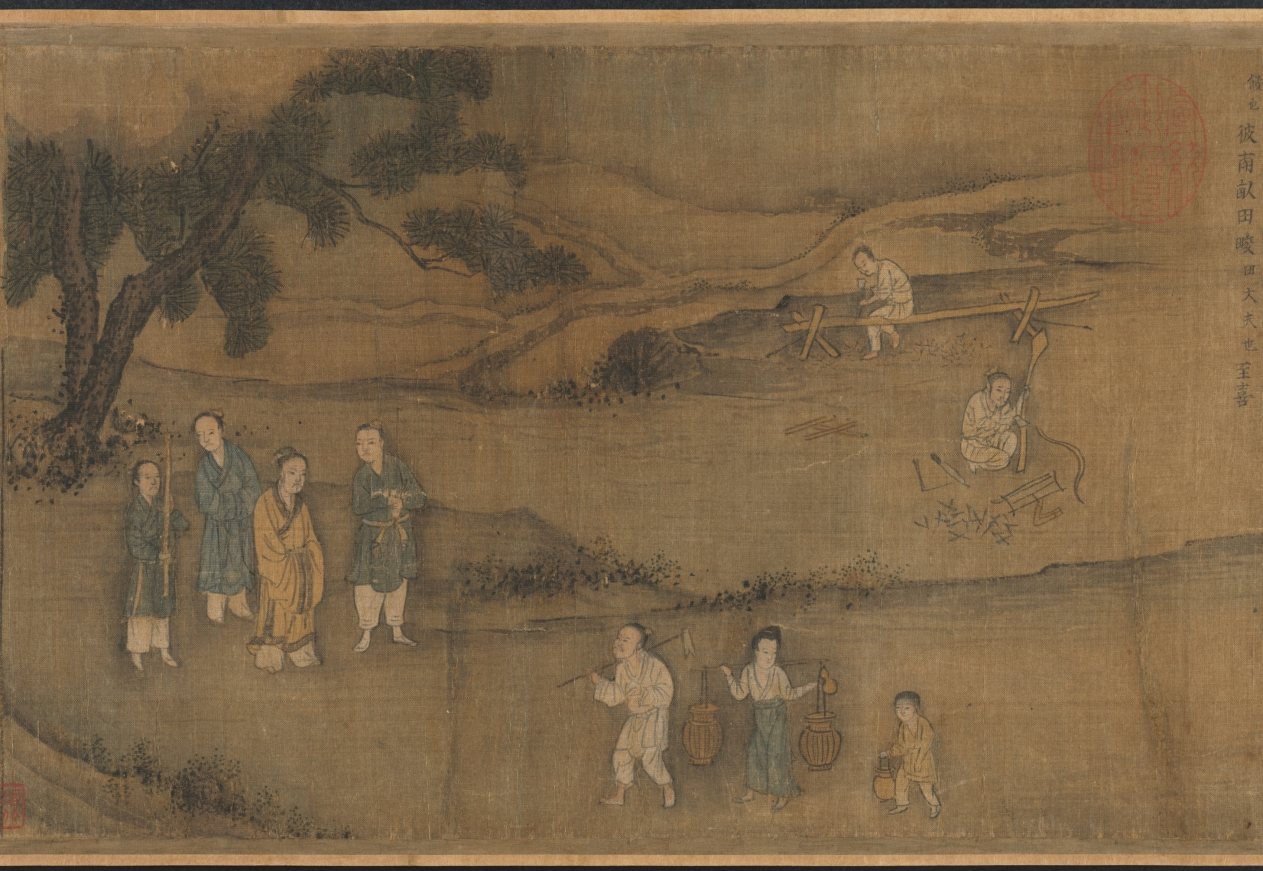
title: "Seventh Month" from the Odes of Bin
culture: China, Southern Song dynasty (1127-1279)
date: 1200s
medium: Handscroll; ink and color on silk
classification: Painting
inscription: Colophons: 1. [on the frontispiece] by the Qianlong emperor (dated 1741). 2. by Lu Wan (dated Zhengde dingchou, 1517). 2. by the Jiaqing emperor (dated 1807).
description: According to Confucian thought, the ruler looks after the well-being of his people which involves agricultural activities. Seventh Month from the ancient Odes of Bin in the Shijing (Book of Poetry) describes occupations throughout the year, including plowing, harvesting, hunting, making clothes, and observing rituals. The earliest illustrations of these Odes accompanied by text were commissioned by Southern Song emperor Gaozong (reigned 1127–1162). As the lower Yangzi delta had become the new seat of government, Gaozong had sets of these illustrations produced by court artists to revive the dynasty and convince the Confucian officialelite of his legitimacy to rule.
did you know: The Odes of Bin appears in the classic Shijing (Book of Poetry), an anthology of more than 300 poems, folk songs, and ceremonial hymns that were originally chanted to music.